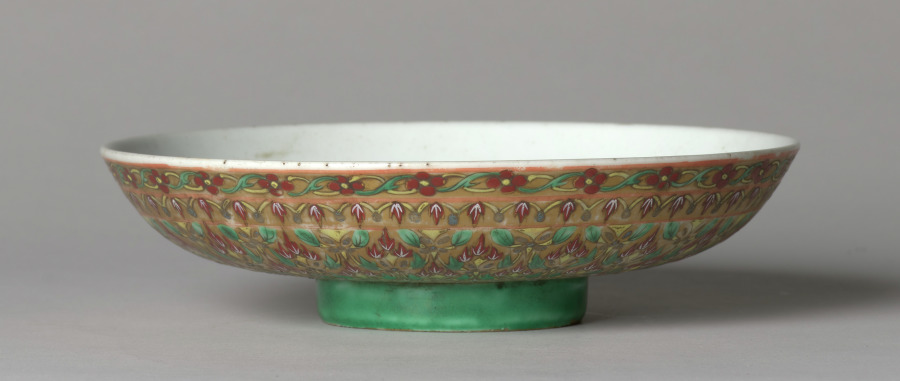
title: Chow Bowl (lid)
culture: Siam, 18th century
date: 1700s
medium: porcelain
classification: Metalwork